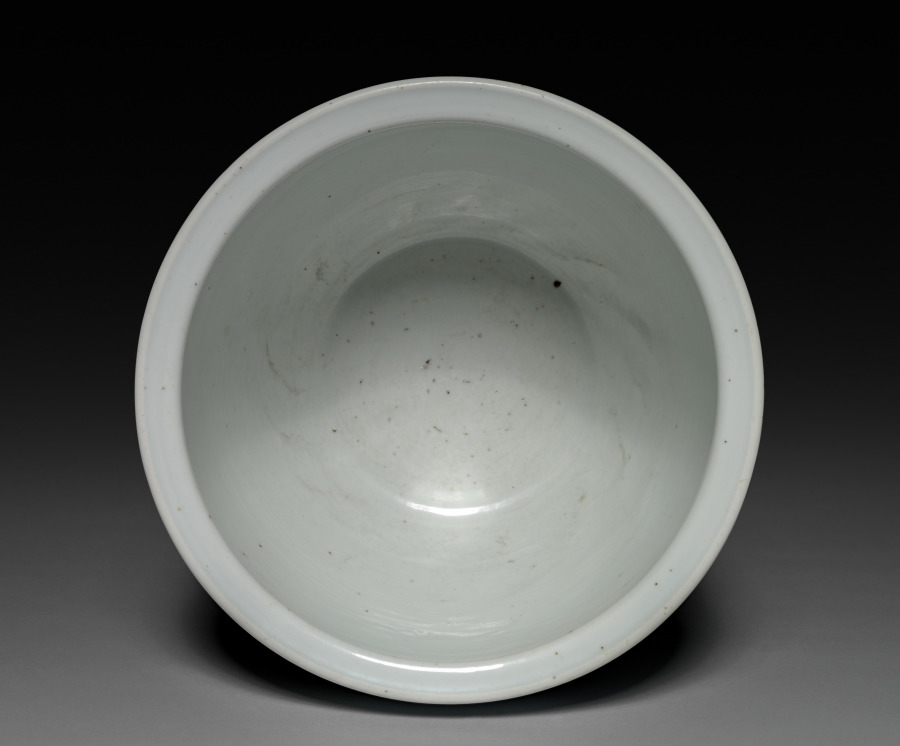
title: Pot with Landscape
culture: China, Jiangxi province, Jingdezhen kilns, Qing dynasty (1644-1911), Kangxi reign (1662-1722)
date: 1662–1722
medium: porcelain with underglaze blue decoration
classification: Ceramic